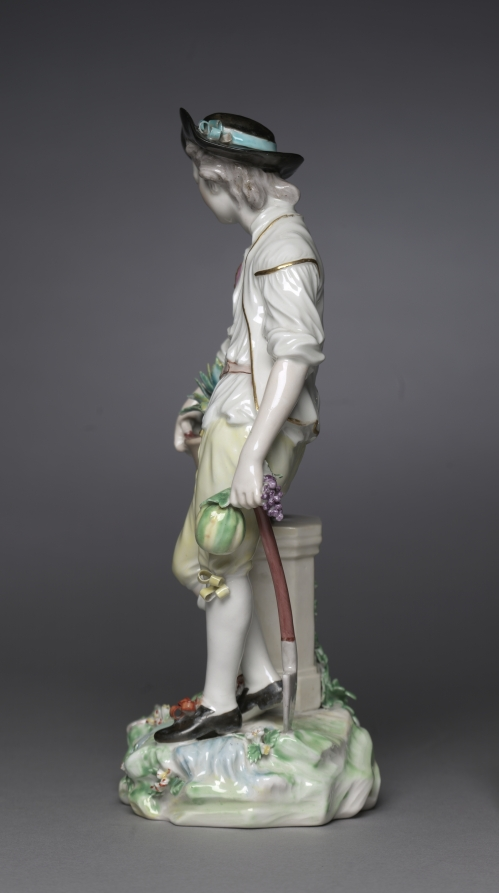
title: Earth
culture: England, Derby, 18th century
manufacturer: Derby Porcelain Factory (Chelsea-Derby Period, 1770–84)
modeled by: Pierre Stèphan (Swiss, active 1760–98)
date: c. 1775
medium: soft-paste porcelain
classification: Ceramic